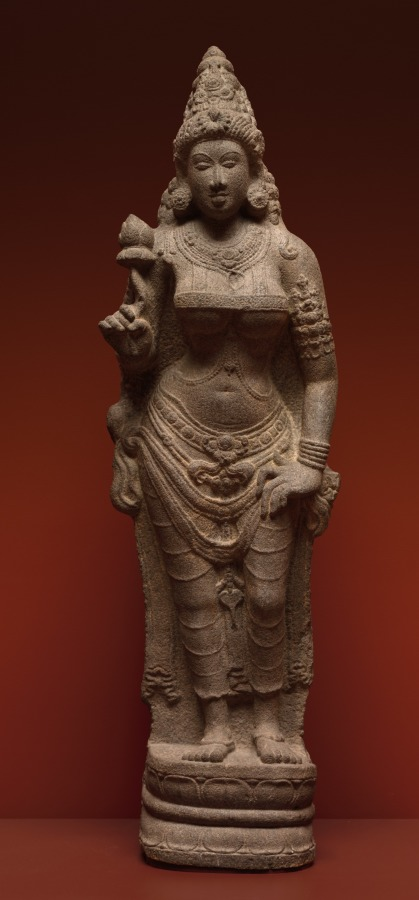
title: Shri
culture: South India, Tamil Nadu, probably Pudokkatai, early Chola Dynasty, 10th Century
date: 900–950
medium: granite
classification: Sculpture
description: One of Vishnu's two wives, Shri, the goddess of abundance and good fortune, holds the lotus flower in her left hand.